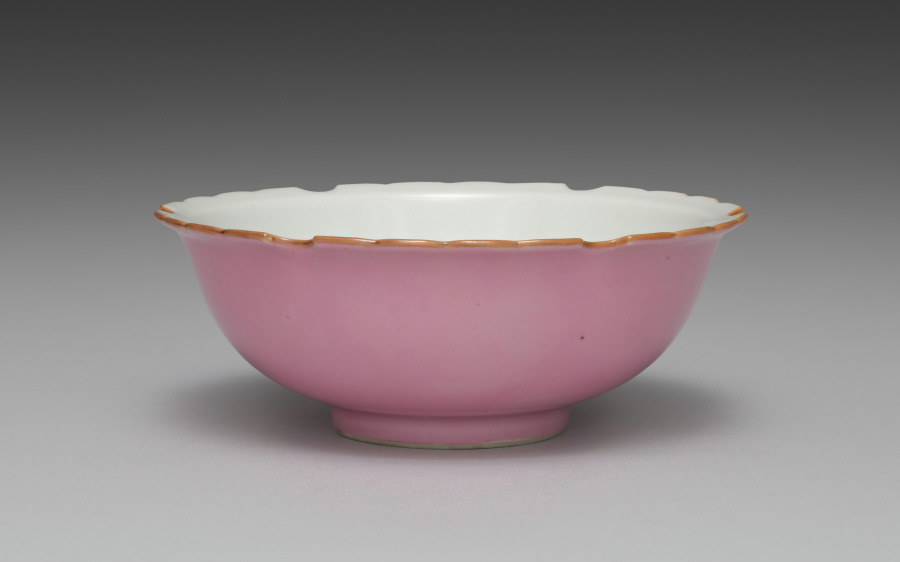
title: Dish from Snow-Flake Side Dishes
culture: Japan, Meiji period (1868–1912)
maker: Seifū Yohei III (Japanese, 1851–1914)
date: 1893–1914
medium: One from a set of six porcelain dishes; porcelain with lobed rims and pink glaze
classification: Ceramic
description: According to the box lid, this set of six side dishes, or mukōzuke, are “snow-flower style” (sekkashiki), having mouths shaped like snowflakes. Their mouths, which have six lobes and scalloped edges, are traced with brown iron oxide at the rim. The outside of each bowl is glazed with a very bright pink over the basin and foot, and the inside is left white. From directly above, one sees a snowflake-like shape, and from the side, they seem to float above a rosy ground.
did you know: The box for this set of dishes has an inscription on the side noting that they were for a person with the family name Nakamoto.